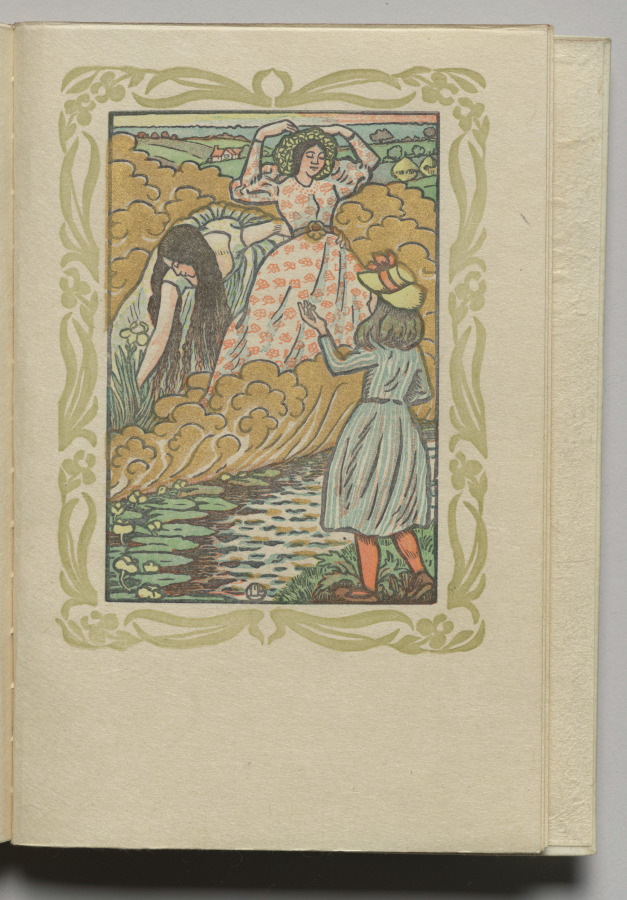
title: The Queen of the Fishes: Plate 12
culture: England, 19th century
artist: Lucien Pissarro (British, 1863–1944)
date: 1894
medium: color woodcut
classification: Bound Volume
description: Pissarro, son of the French Impressionist artist Camille Pissarro, moved to England in 1890. By 1894 he and his wife, Esther Bensusan Pissarro, had bought a printing press and established the Eragny Press. Influenced by William Morris, they were involved in every step of the production process: designing, cutting the woodblocks, setting type, and printing. The first book published by Ergany Press, The Queen of the Fishes, is based on an old fairy tale in which a peasant boy and girl escape the hardships of their lives by fantasizing that they have been turned into a giant oak and a splendid fish, respectively.